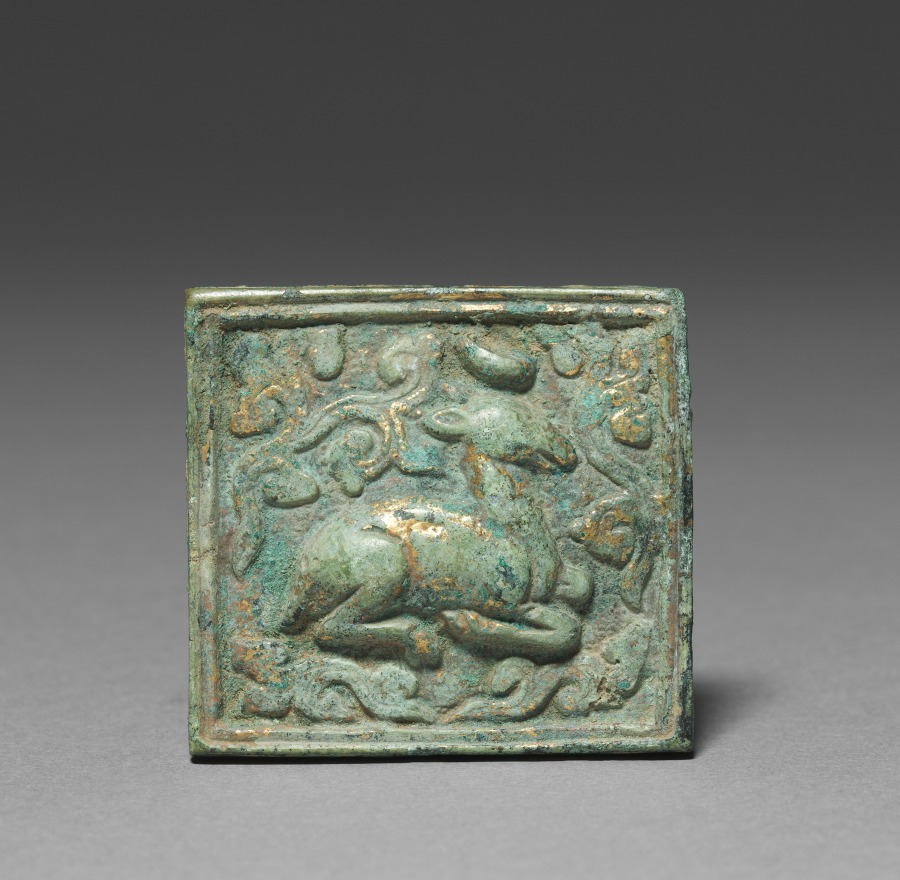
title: Belt Ornament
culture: Korea, Goryeo dynasty (918–1392)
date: 918–1392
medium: gilt bronze with repoussé relief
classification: Metalwork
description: Metallurgy advanced remarkably in the Goryeo period (918-1392), explaining why a large quantity of sophisticated metal artifacts with delicate designs were used not only as daily accessories but also as burial goods. Belt ornaments like this example were fixed to leather belts. Surround by intricate arabesque patterns, a seated dear was done in the repoussé technique. Such animal motifs were widely shared among Eastern Eurasian tribes, from where the first settlers in the Korean peninsula originated.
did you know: The Japanese antique dealer Yamanaka & Company, which opened its branches in New York (1895) and Boston (1899), sold small Korean archaeological materials such as this belt ornament to American collectors in the early 20th century.